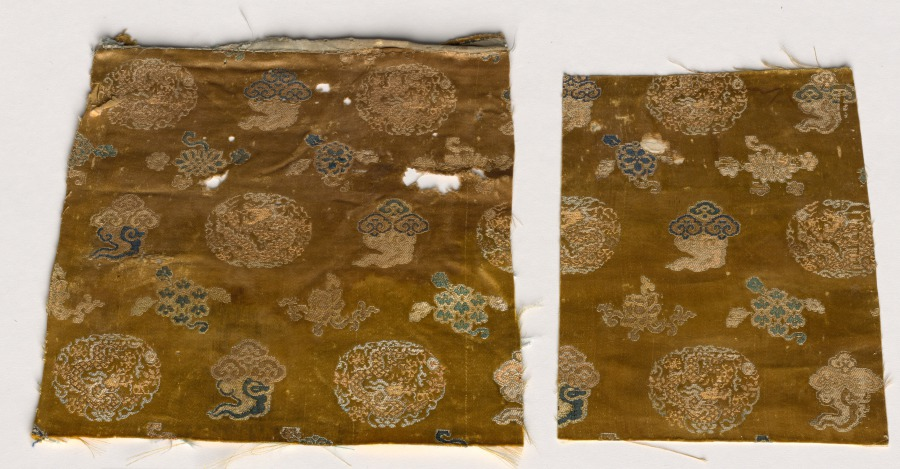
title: Fragments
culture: China, 18th century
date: 1700s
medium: brocaded satin, silk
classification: Textile